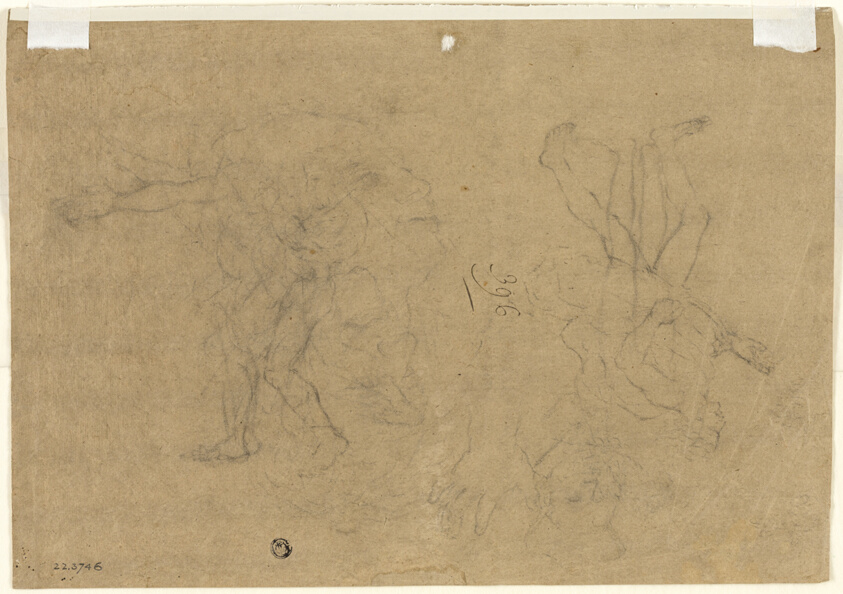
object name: Drawing and Watercolor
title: Sheet of Studies: Three Women and a Hand (recto); Sketches of Male Nudes, Heads and Hand (verso)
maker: François Marot (French, 1666-1719)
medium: Black chalk, heightened with white chalk (recto), and black chalk (verso), on tan laid paper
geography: France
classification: drawings (visual works); prints and drawing